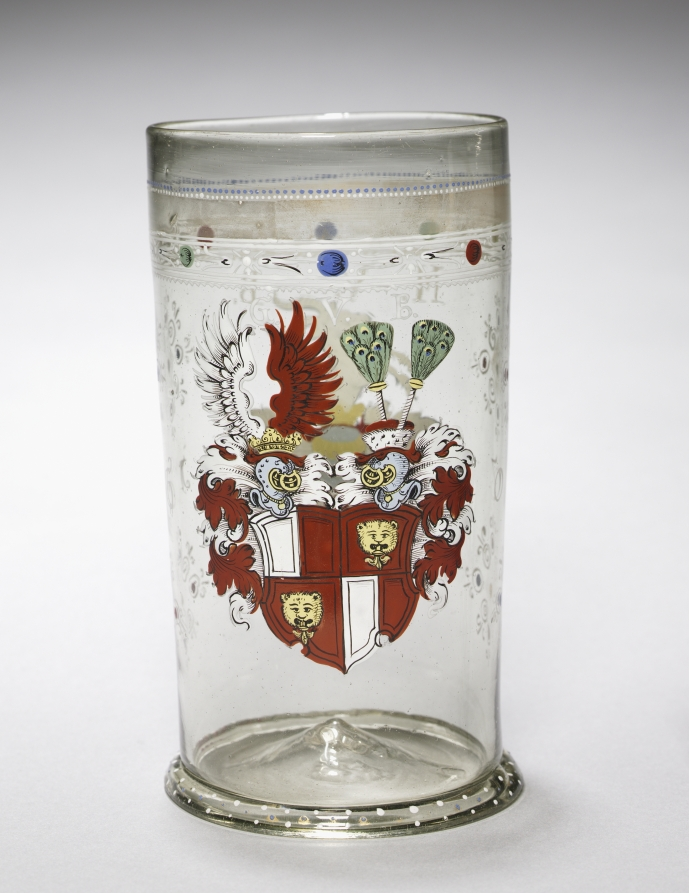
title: Beaker with Coats-of-Arms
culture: Germany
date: 1607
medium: enameled glass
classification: Glass